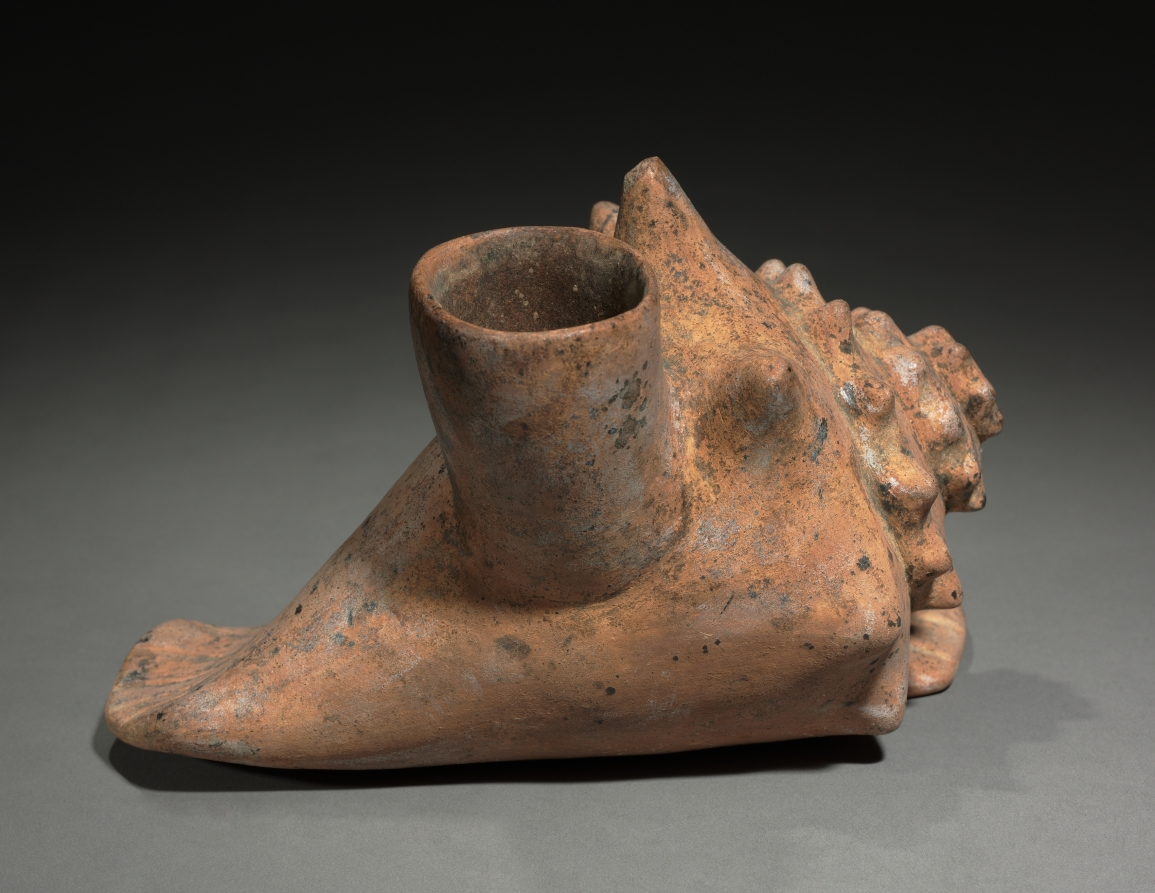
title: Conch Shell Trumpet Vessel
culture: West Mexico, Colima, Comala style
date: 200 BCE–300 CE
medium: earthenware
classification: Ceramic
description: Conch shell trumpets were used during many kinds of important events throughout the ancient Americas. The shells were converted to trumpets by removing the tip to form a mouthpiece, as this ancient ceramic replica of a trumpet shows. Holes were often drilled in the shell for a carrying cord.